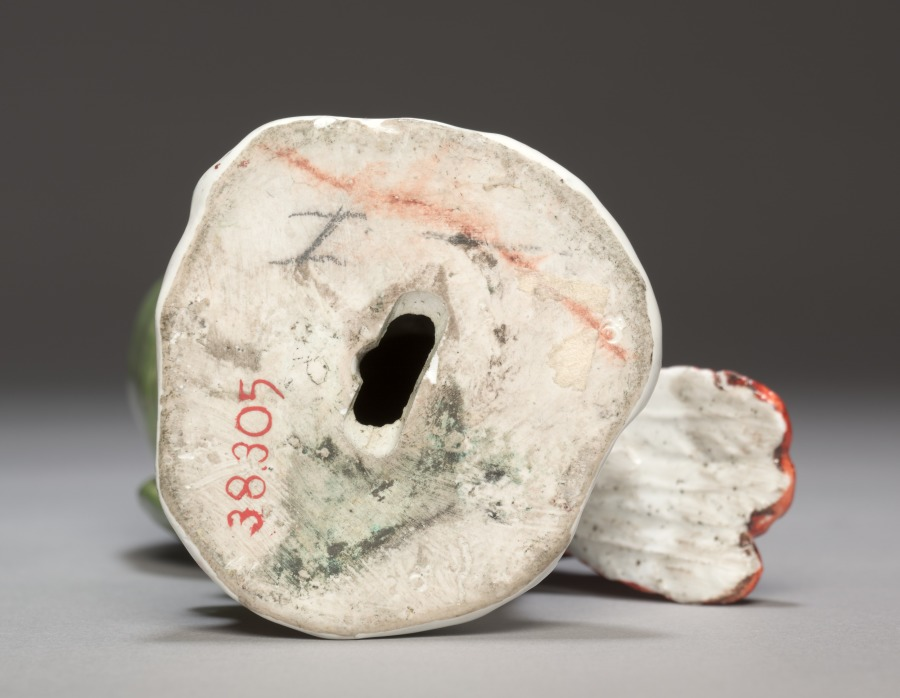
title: Candelabrum with Parrot (Parrot)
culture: Germany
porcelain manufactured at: Meissen Porcelain Factory (German, est. c. 1710)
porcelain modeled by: Johann Joachim Kändler (German, 1706–1768)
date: c. 1740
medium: porcelain mounted in gilt bronze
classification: Ceramic